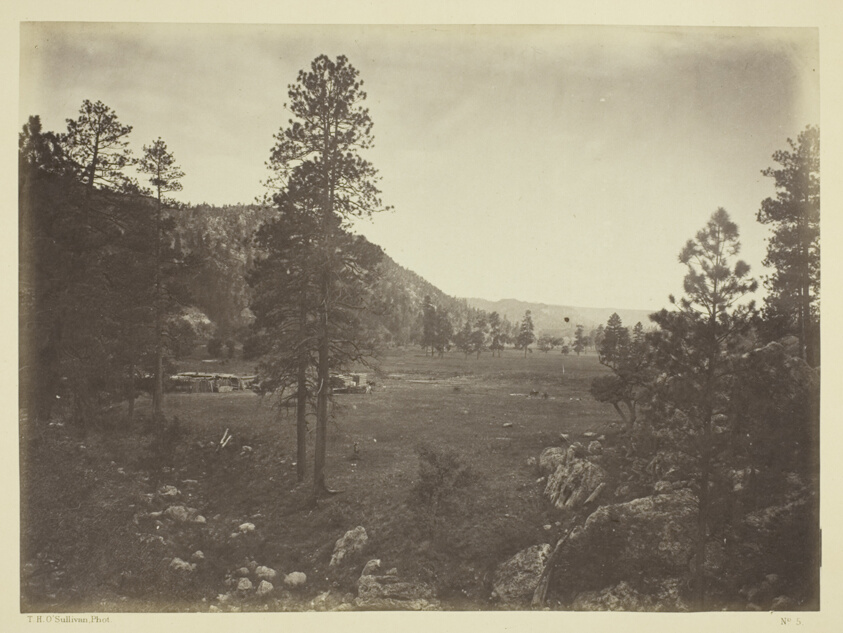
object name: Photograph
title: Cooley's Park, Sierra Blanca Range, Arizona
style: 19th century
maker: Timothy O'Sullivan (American, born Ireland, 1840–1882)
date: 1873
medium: Albumen print, from the album "Geographical & Geological Explorations & Surveys West of the 100th Meridian," vol. 1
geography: United States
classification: albumen silver print; photographic process; photography; photograph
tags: Collected by Hugh Edwards